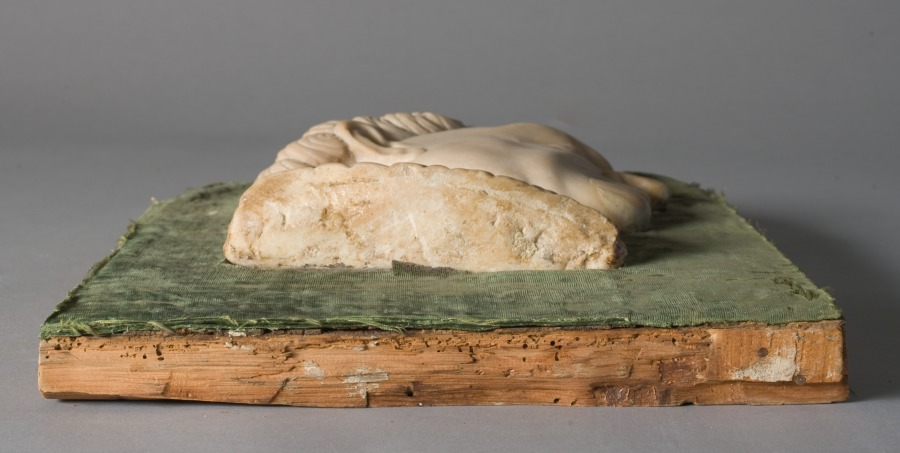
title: Portrait of Francesco Sforza and Frame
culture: Italy, Lombardy, 15th century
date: 1450–1499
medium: marble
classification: Sculpture